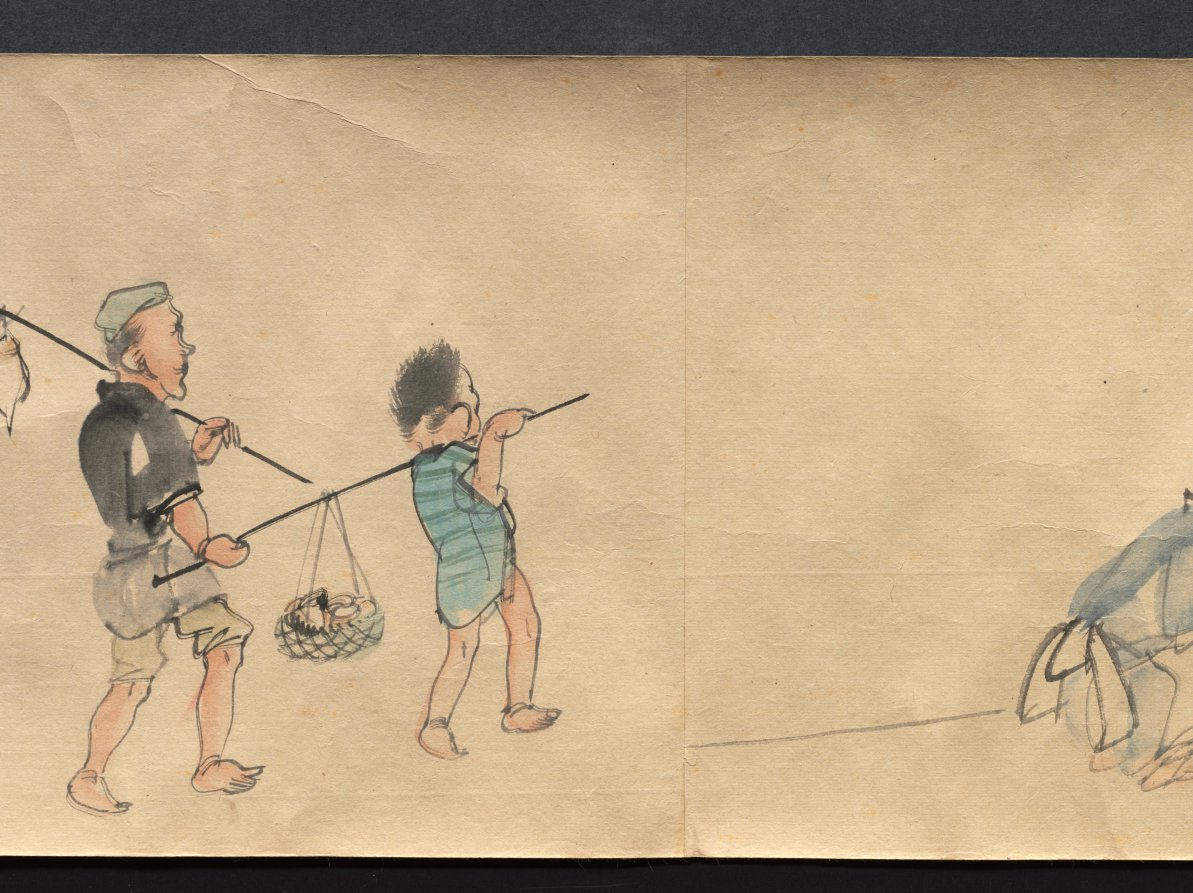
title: Festival Scenes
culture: Japan, Edo period (1615–1868)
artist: Suzuki Nanrei (Japanese, 1775–1844)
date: c. 1795–1844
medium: handscroll; ink and color on paper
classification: Painting